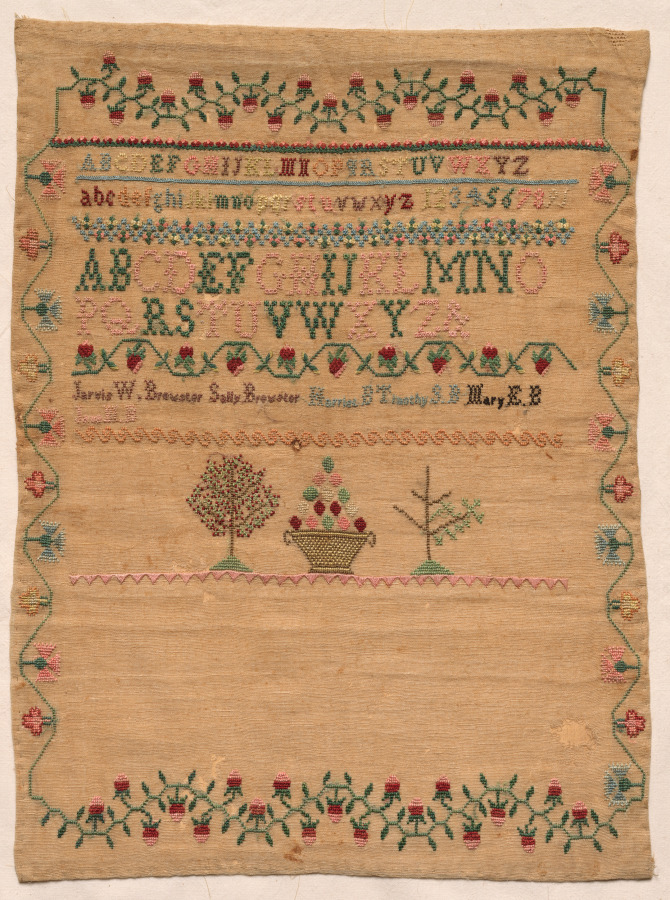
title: Sampler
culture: England, early 19th century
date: early 1800s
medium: embroidery: silk on linen tabby ground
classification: Sampler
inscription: "ABCDEFGHIJKLMNOPQRSTUVWXYZ/ abcdefghijklmnopqrstuvwxyz1234567891/ ABCDEFGHIJKLMNO/ PQRSTUVWXYZ/ Jarvis W. Brewster Sally Brewster Harriett B Timothy S..B Mary E. B/ Jane M. B."